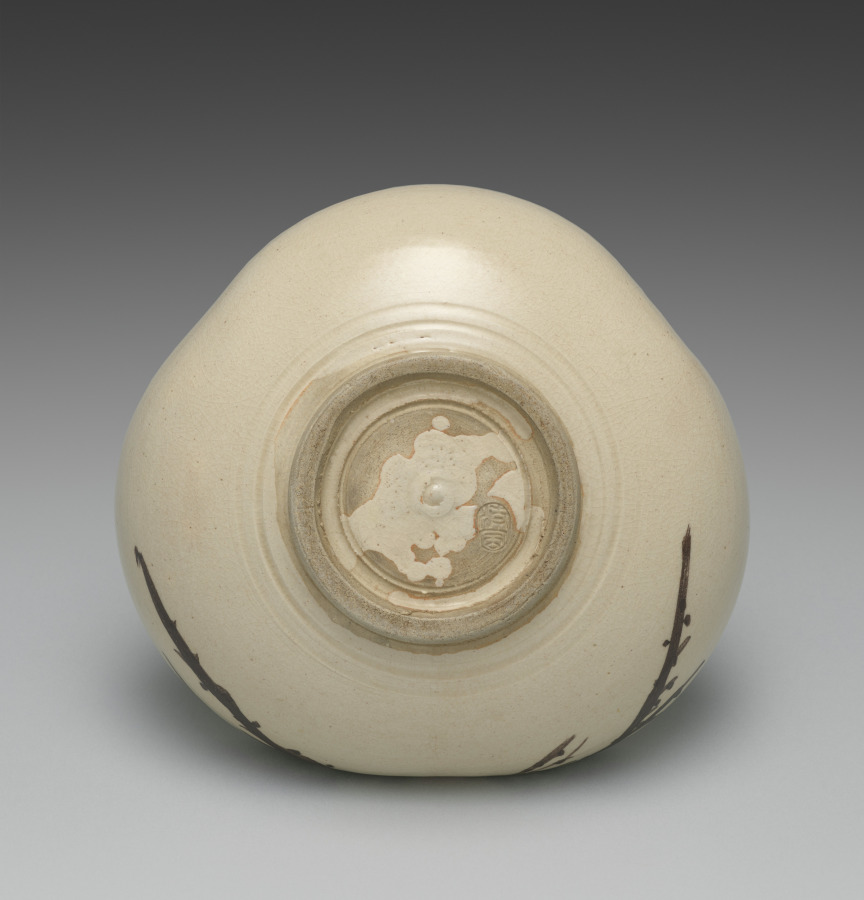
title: Pine-shaped Dish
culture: Japan, Meiji period (1868–1912)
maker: Seifū Yohei III (Japanese, 1851–1914)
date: 1893–1914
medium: Stoneware with underglaze iron oxide and crackled glaze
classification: Ceramic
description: The clever design on this stoneware Awata-style dish makes use of the interior and exterior surfaces to present a close-up view of pine needles on the branch painted in underglaze iron oxide. The branch is shown on the outside of one side of the dish, while the needles fan out across the inside. The entire dish, when seen from above, reveals a shape resembling the mushroom cap–like motif appearing in textile designs and in classical Japanese paintings called Yamato-e to represent pine trees.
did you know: Awata ware, named for the area of Kyoto where it was historically produced, is considered a subset of Kyoto ware. It is characterized by a very light brown body with a transparent crackled glaze.